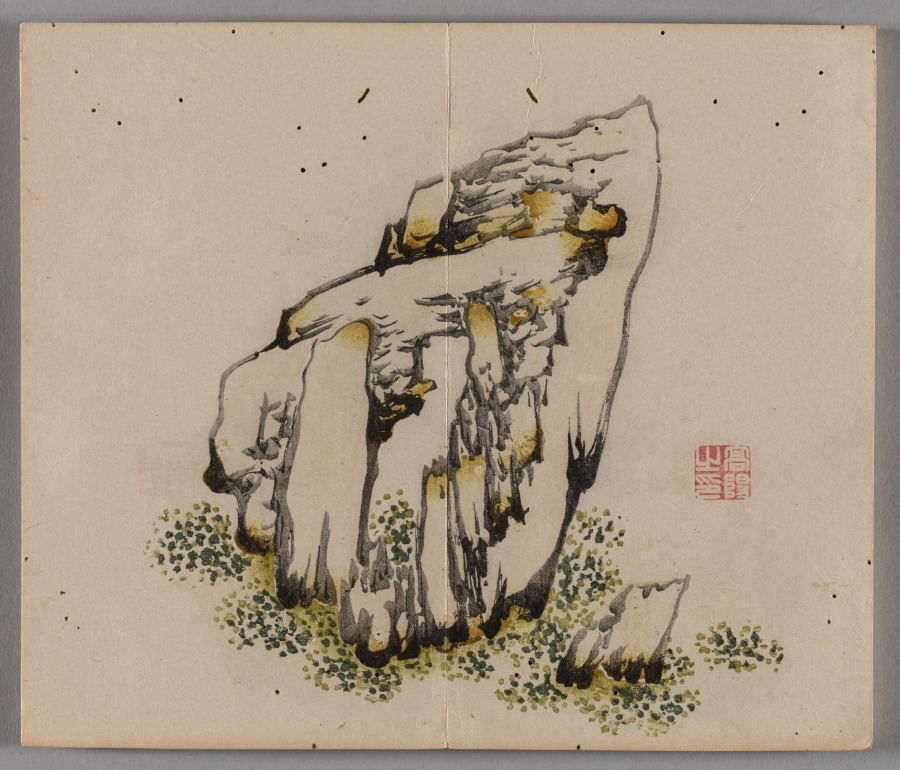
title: Ten Bamboo Studio Painting and Calligraphy Handbook (Shizhuzhai shuhua pu): Rocks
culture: China, Qing dynasty (1644-1911)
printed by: Hu Zhengyan (Chinese, c. 1584–1674)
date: 1633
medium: Woodblock-printed book; ink and colors on paper; first edition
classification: Print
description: Color printing reached a level of perfection in the early 1600s, as seen in this Ten Bamboo Studio Collection of Calligraphy and Painting and the Mustard Seed Garden Manual of Painting (printed 1679 and 1701). The painterly quality, precision in registering (aligning) the woodblocks, and harmonious colors made them the most successful color print editions in Chinese history. Both editions were printed and compiled in Nanjing, spread nationwide, and had a great impact on the arts in Japan and Korea.